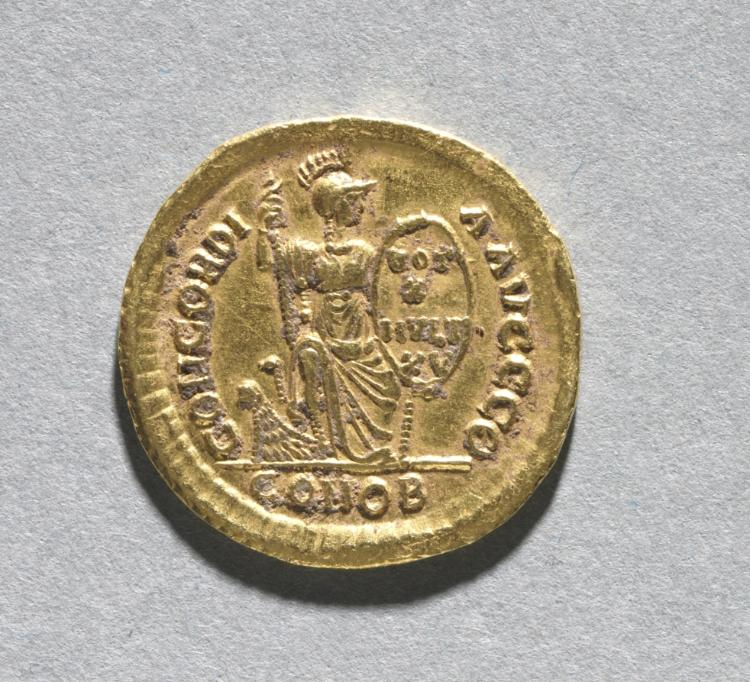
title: Solidus of Theodosius I the Great (reverse)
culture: Byzantium, Constantinople, Byzantine period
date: 383–88 CE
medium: gold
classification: Coins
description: Byzantine Gold Coins The vast number of surviving Byzantine coins attests to the level of trade across the empire. Controlled and supervised by the emperor, the producers of coins took care to represent his authority and reflect his stature. Talented artists were recruited to engrave the dies (molds) used for the striking of coins. Emperors increasingly came to include their heirs and co-emperors on their coinage, as well as other family members or even earlier rulers. Coins were recognized, then as now, as small, portable works of art. With their inscriptions and images, Byzantine coins provide valuable documentation of historical events and a record of the physical appearance of the emperors. The coins shown here include the solidus, the basic gold coin of 24 karats; the tremissis, a gold coin of one-third the weight and value of the solidus; and the nomisma, which in the 10th century replaced the solidus as the standard gold coin.